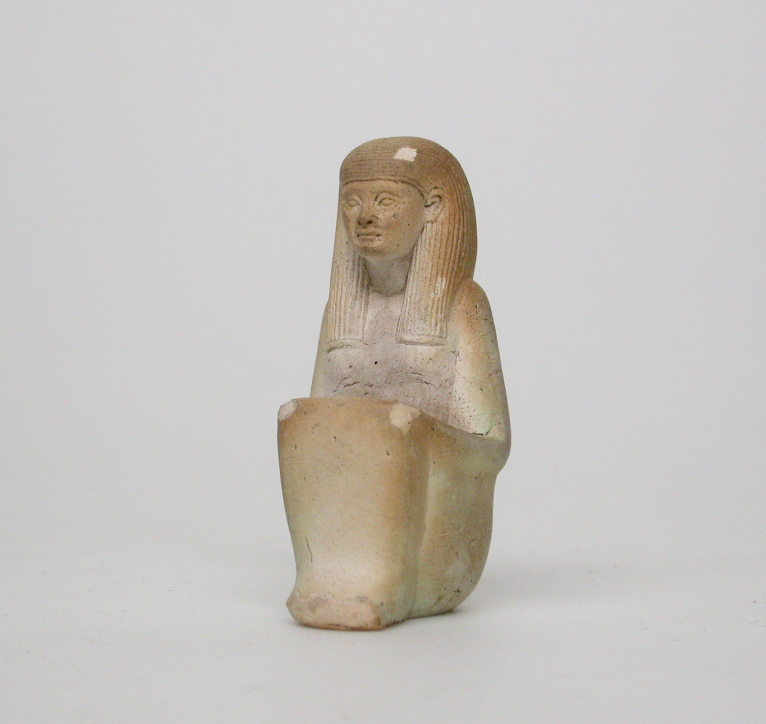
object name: Sculpture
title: Statuette of the Goddess Maat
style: second intermediate period, eighteenth dynasty, new kingdom, egyptian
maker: Egyptian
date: New Kingdom, Dynasty 18 or earlier (1623–1293 BCE)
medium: Ceramic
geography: Egypt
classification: statuette; ceramics; sculpture; ancient art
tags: goddesses